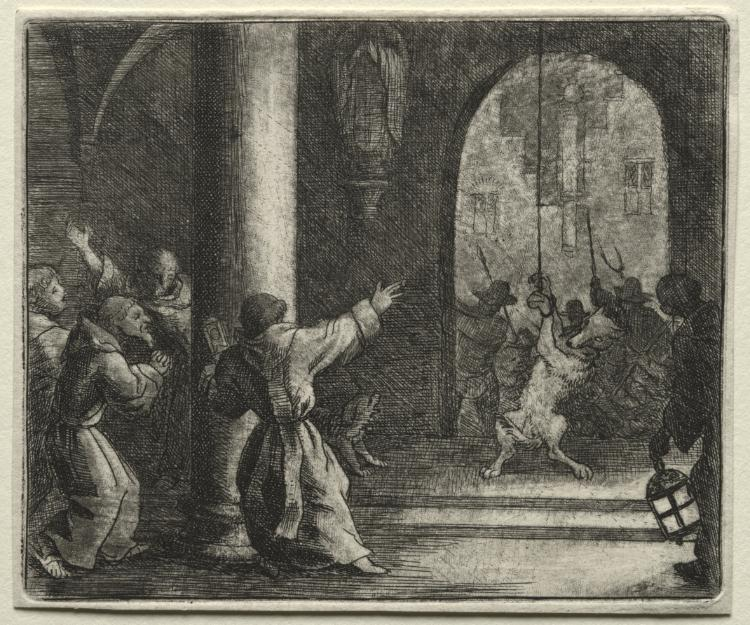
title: Reynard the Fox: Reynard Tricks the Wolf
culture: Netherlands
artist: Allart van Everdingen (Dutch, 1621–1675)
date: 1650–75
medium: etching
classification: Print